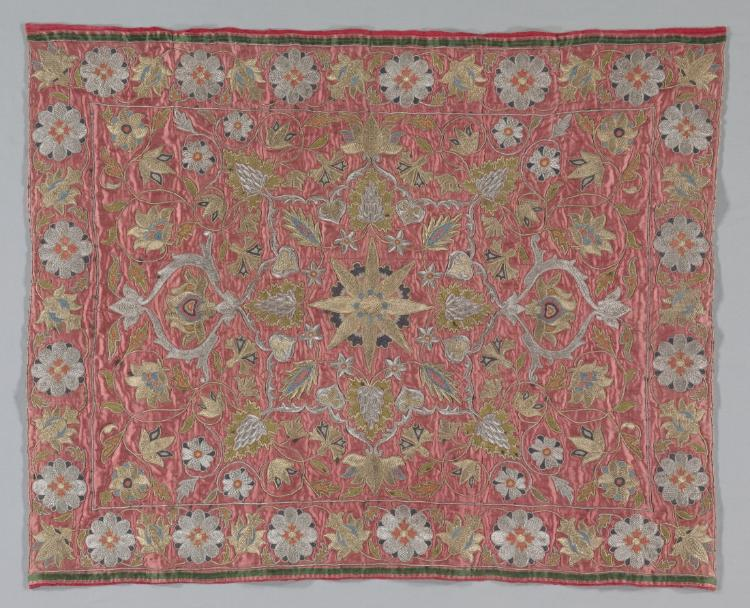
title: Embroidered Textile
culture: Turkey ?, 18th century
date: 18th century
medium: embroidery: silk, and gold and silver filé on silk ground; cotton backing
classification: Embroidery